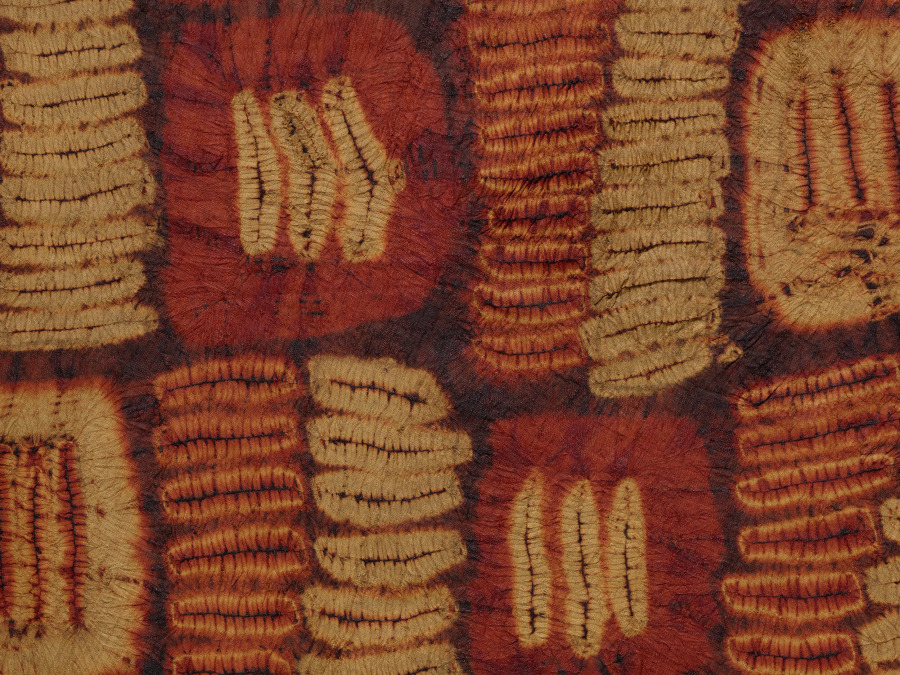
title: Man's Garment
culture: Africa, West Africa, Côte d'Ivoire, Dida-style weavers and dyers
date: possibly early 1900s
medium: Raffia palm fiber (Raphia ruffia or R. vinifera) and dye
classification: Textile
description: Displayed flat to highlight its designs and preserve its delicate fibers, this wrapper was meant to drape around the body. An elite man wore it with one corner over a shoulder, the knotted fringe skimming his ankles. The garment gained its earth-toned geometric patterns through plangi, a knot-and-twist resist dyeing technique; each color is applied in a different dye bath, from lightest to darkest. While their patterns are unique, these garments reflect regional influence: Dida women likely learned hand interlacing from Liberian Kpelle weavers. Such garments were given as gifts or worn on special occasions, at least into the 1990s.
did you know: The tying of fabric during the making of this garment gives its surface a distinctively "crinkled" texture.